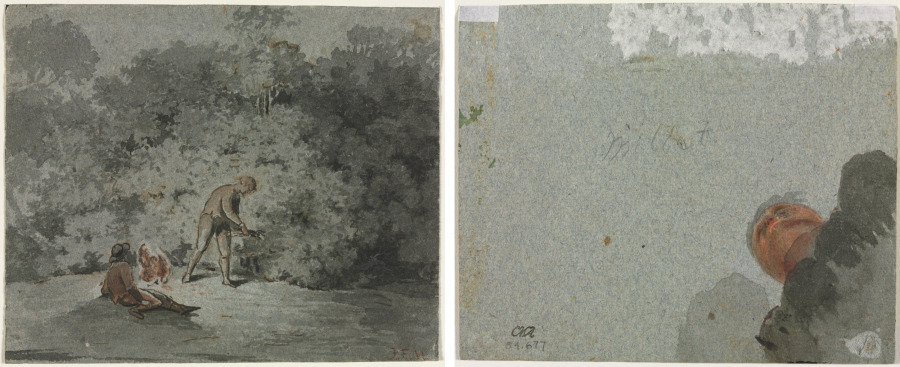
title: Faggot Gatherer (recto) Study of a Head seen from Below (verso)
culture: France, 17th century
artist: attributed to Francisque Millet (French, 1642–1679)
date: third quarter 1600s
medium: pen and brown ink and brush and gray and brown wash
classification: Drawing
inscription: signed, lower right, in brown ink: J.F.M.